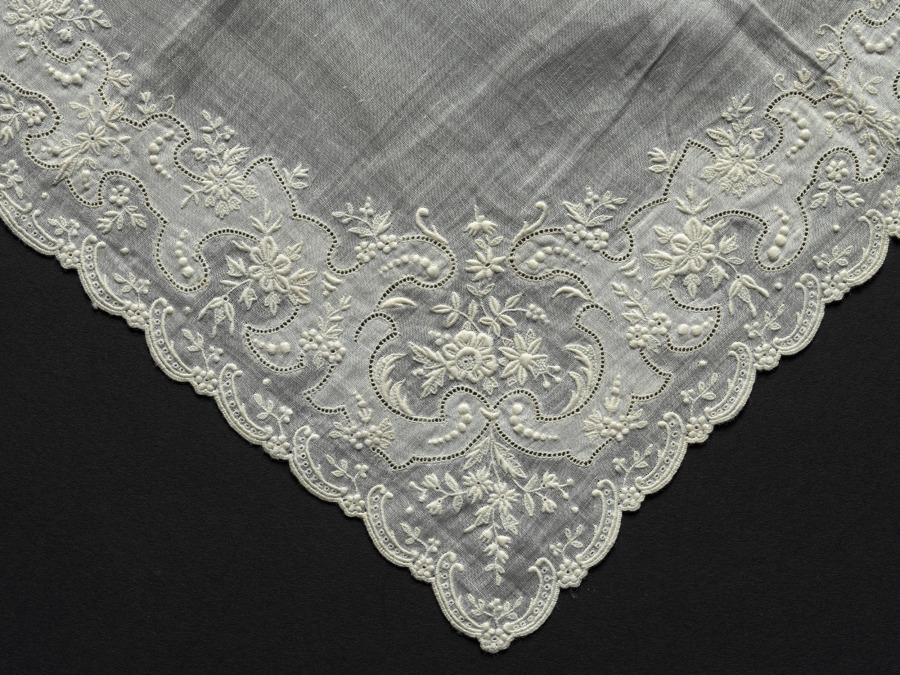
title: Handkerchief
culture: Switzerland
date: 1900s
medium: Plain weave linen: embroidered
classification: Embroidery